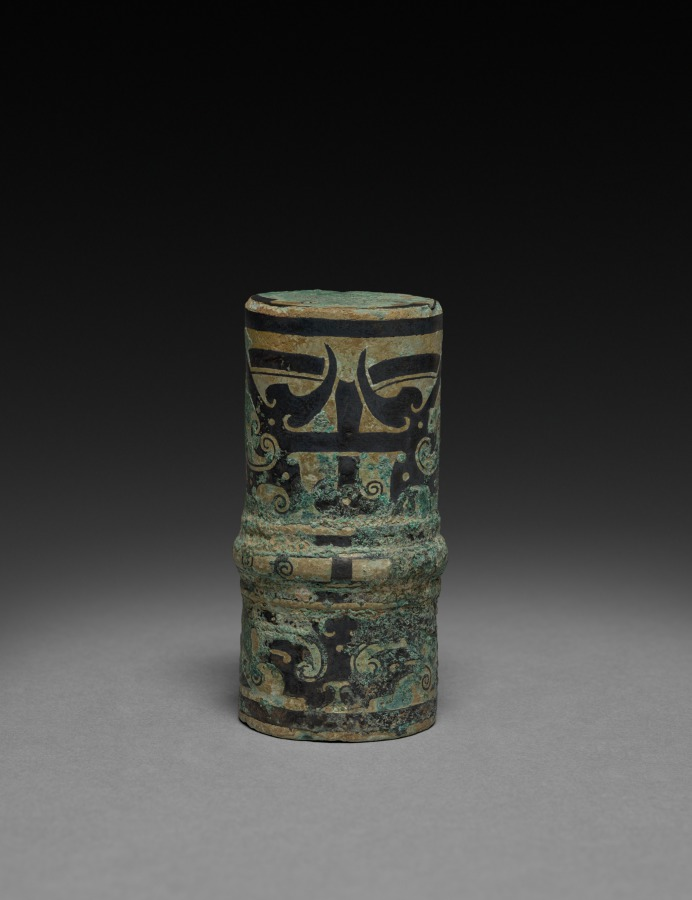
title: Shaft Mounting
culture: China, Eastern Zhou dynasty (770–256 BCE), Warring States period (475–221 BCE)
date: 500–300 BCE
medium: bronze inlaid with gold and silver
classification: Metalwork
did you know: This small circular finial is treated with whorls, angles, and horn- or beak-like parts that suggest either oxen or birds.